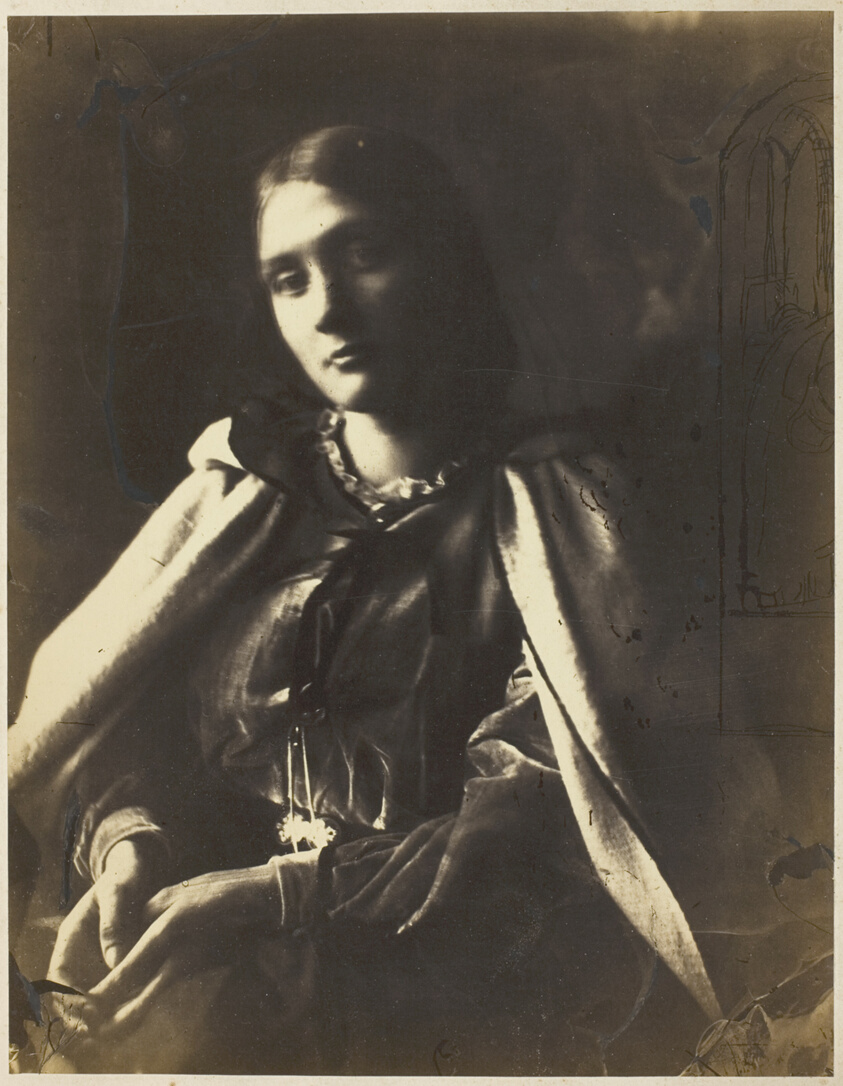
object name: Photograph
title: Julia Jackson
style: 19th century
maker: Julia Margaret Cameron (English, 1815–1879)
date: 1864/65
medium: Albumen print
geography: England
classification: albumen silver print; photographic process; photography; photograph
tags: portraits, portraits: female subject, photography